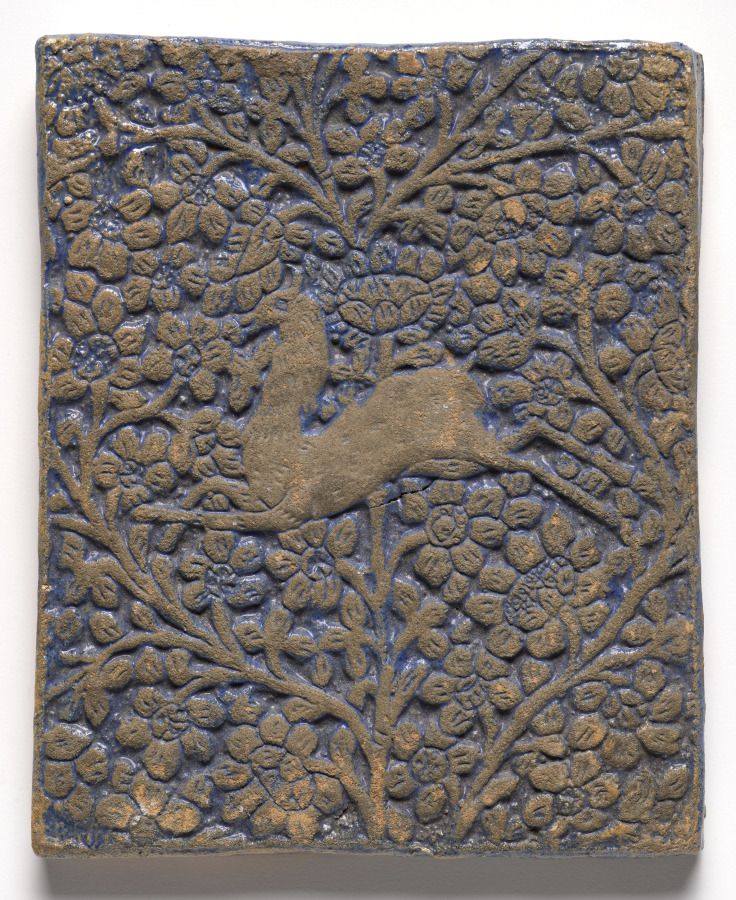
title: Tile- Antelope in Foliage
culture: America, Pennsylvania, Doylestown, Early 20th century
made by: Moravian Pottery and Tile Works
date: before 1921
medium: glazed ceramic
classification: Ceramic